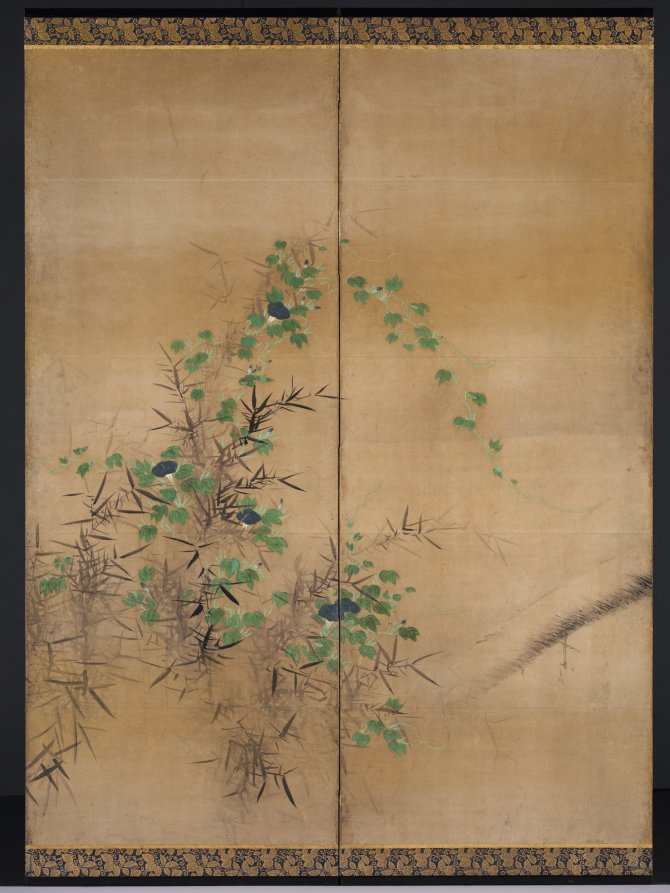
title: Winter and Summer Flowers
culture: Japan, Momoyama period (1573–1615)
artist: Kaihō Yūshō (Japanese, 1533–1615)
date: c. 1600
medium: One of a pair of six-panel folding screens; ink, color, and gold on paper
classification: Painting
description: White camellias bloom behind a large pine in the right screen and blue morning glories creep through bamboo in the left screen of this composition. The mountains and bridge suggest a continuous landscape, but the paintings actually juxtapose flowers of winter and summer, with time progressing from right to left. Kaihō Yūshō painted similar landscapes for Zen temples in Kyoto.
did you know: The pine and bamboo are defined by ink wash, but the flowers take form through color within contour lines.